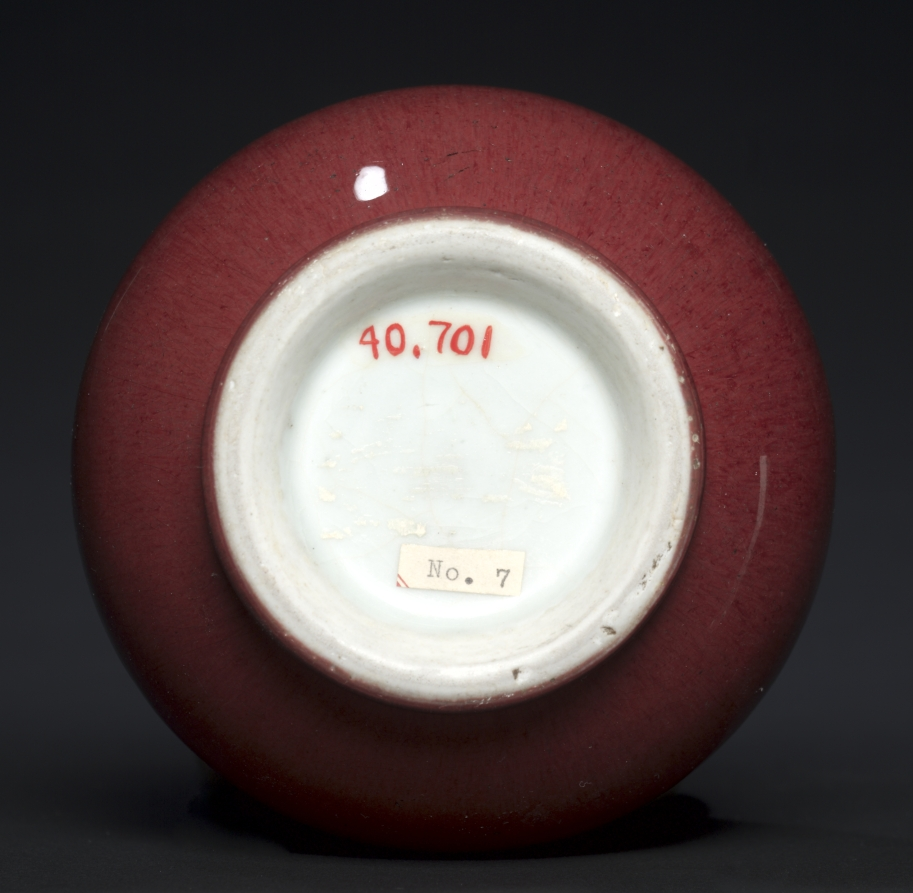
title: Sang de boeuf Vase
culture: China, Qing dynasty (1644-1911)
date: early 1900s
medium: porcelain with copper red glaze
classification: Ceramic